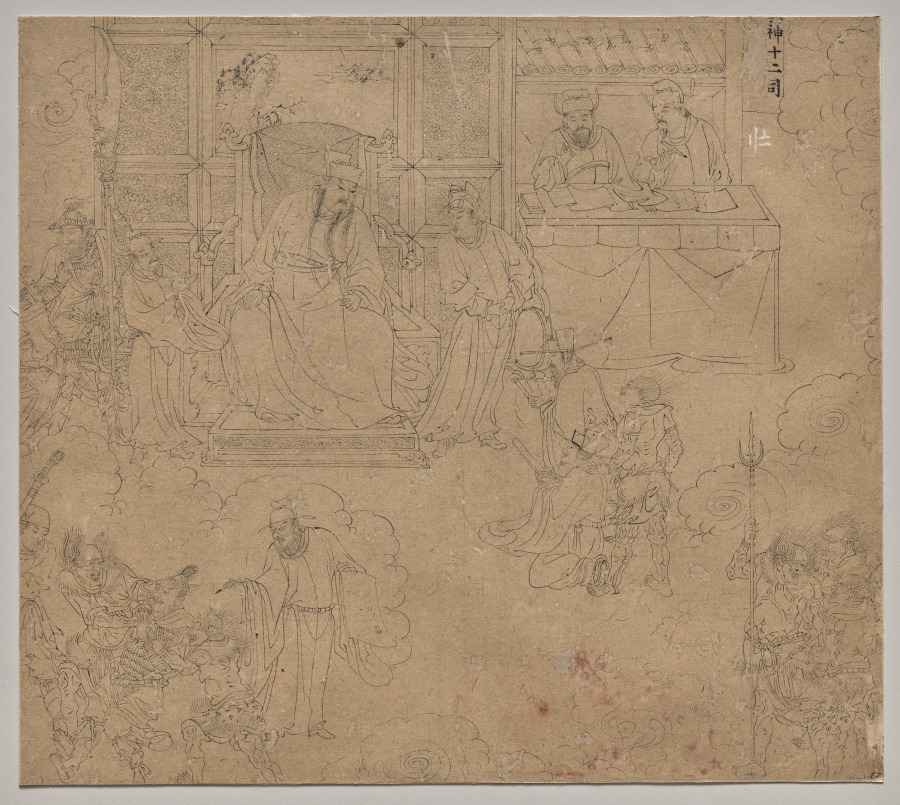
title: Album of Daoist and Buddhist Themes: Kings of Hells: Leaf 27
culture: China, Southern Song dynasty (1127-1279)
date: 1200s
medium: Album, ink on paper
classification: Painting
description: This leaf is part of a set depicting the Ten Kings of Hell. The theme transforms the Indian Buddhist view of judgment after death into a typical Chinese bureaucratic process. Before being permitted to transmigrate into the next life, a soul is tried by 10 different kings in a process that lasts three years. Each king is assisted by scribes and officials who report on the good and bad deeds upon which a verdict is given. In the foreground, demons conduct punishments. The inscription here refers to the 12 functionaries assisting the king.